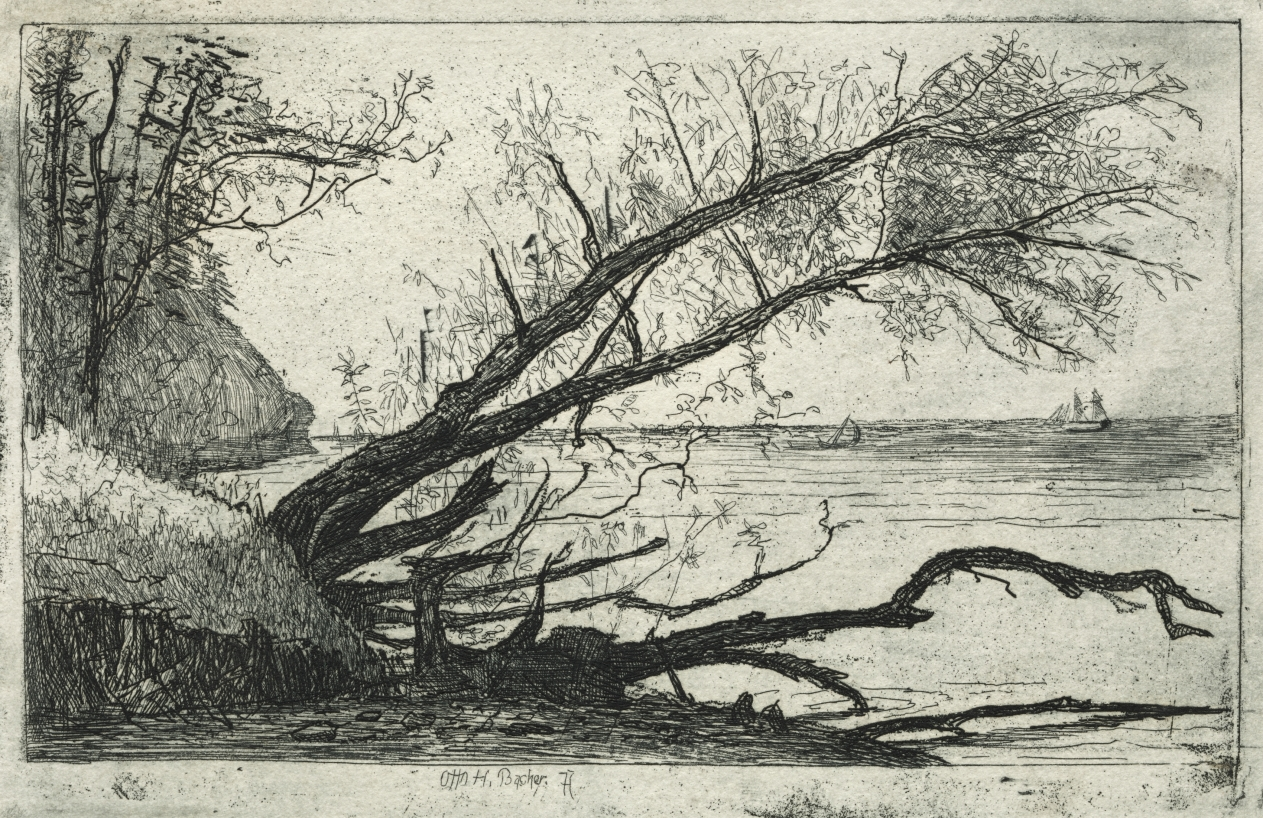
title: Lake Shore, Cleveland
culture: America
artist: Otto H. Bacher (American, 1856–1909)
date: 20th century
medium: etching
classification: Print